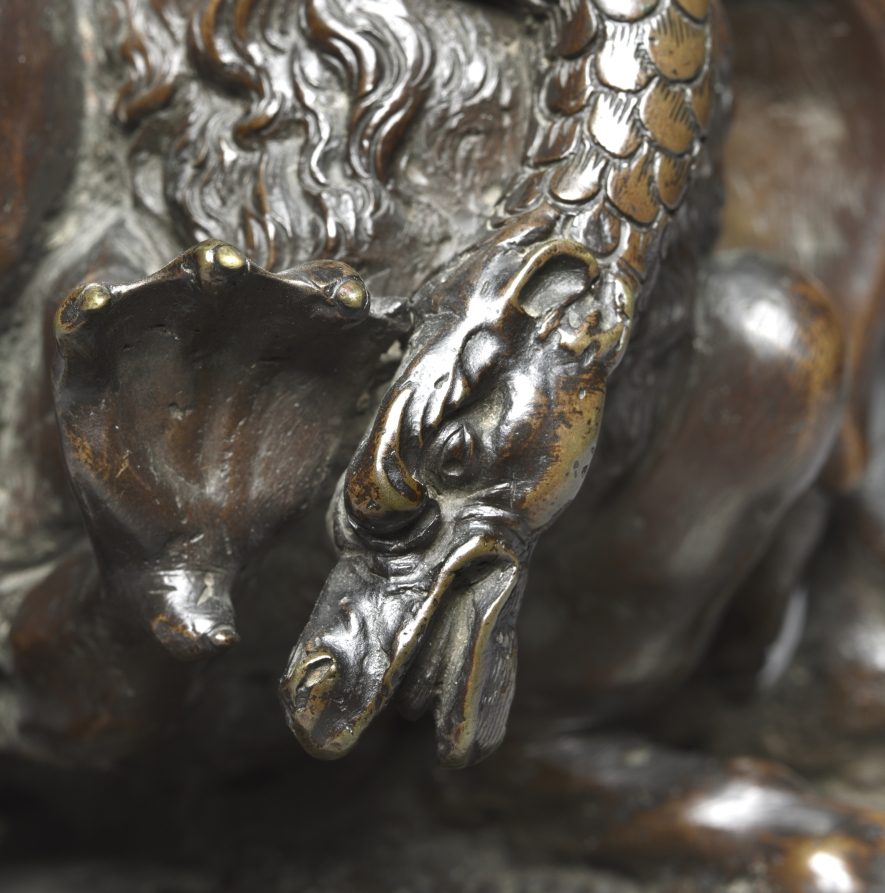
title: Hercules and the Hydra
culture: Northern Europe, late 16th-early 17th century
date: late 1500s-early 1600s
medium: bronze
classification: Sculpture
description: Hercules slayed the Lernean Hydra as the second of the ancient hero’s twelve labors. When one of the nine snake-like heads was destroyed, two grew back. Hercules cauterized each stump, allowing him eventually to kill the monster. The object he holds may have been a club, sword, sickle, or torch. The sinuous, scaly Hydra and the defined musculature presented challenging opportunities for sculptors working in bronze. The raw, tumultuous energy and twisting form-associated with artists of the late 1500s-contrasts to Jacopo Sansovino’s earlier Virgin and Child (1951.316).